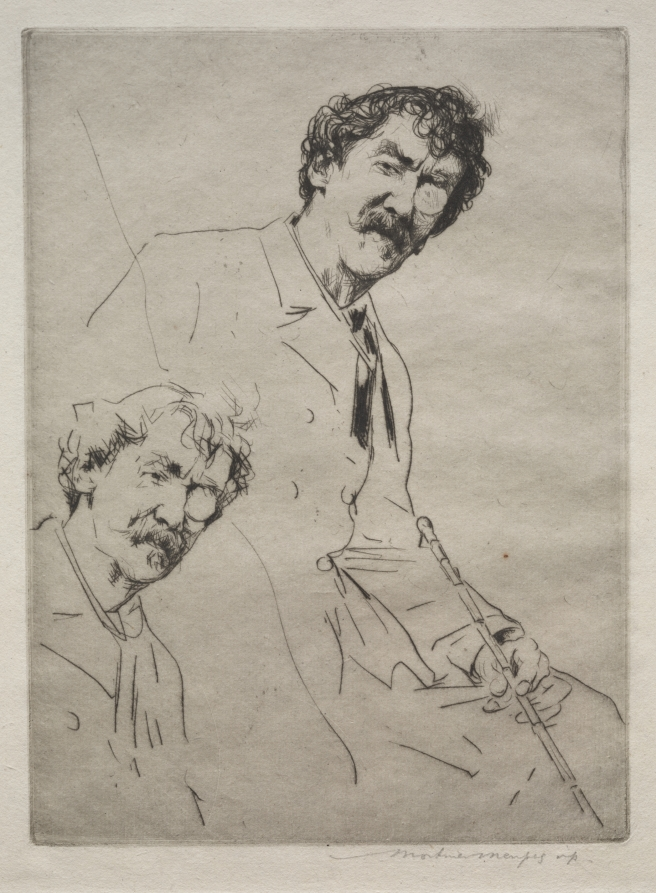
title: James MacNeill Whistler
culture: England, 19th-20th century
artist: Mortimer Menpes (British, 1860–1938)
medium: drypoint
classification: Print